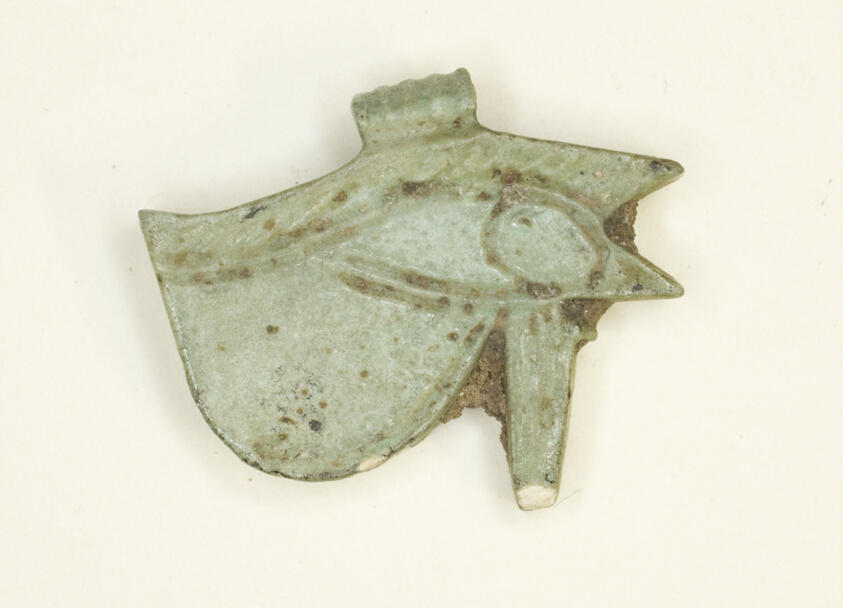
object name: Costume and Accessories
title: Eye of Horus (Wedjat) Amulet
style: third intermediate period, egyptian, ancient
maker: Egyptian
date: Third Intermediate Period, Dynasty 21–25 (about 1069–664 BCE)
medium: Faience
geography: Egypt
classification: amulet; jewelry; ceramics; ancient art; costume; faïence (composite material)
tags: eye of Horus